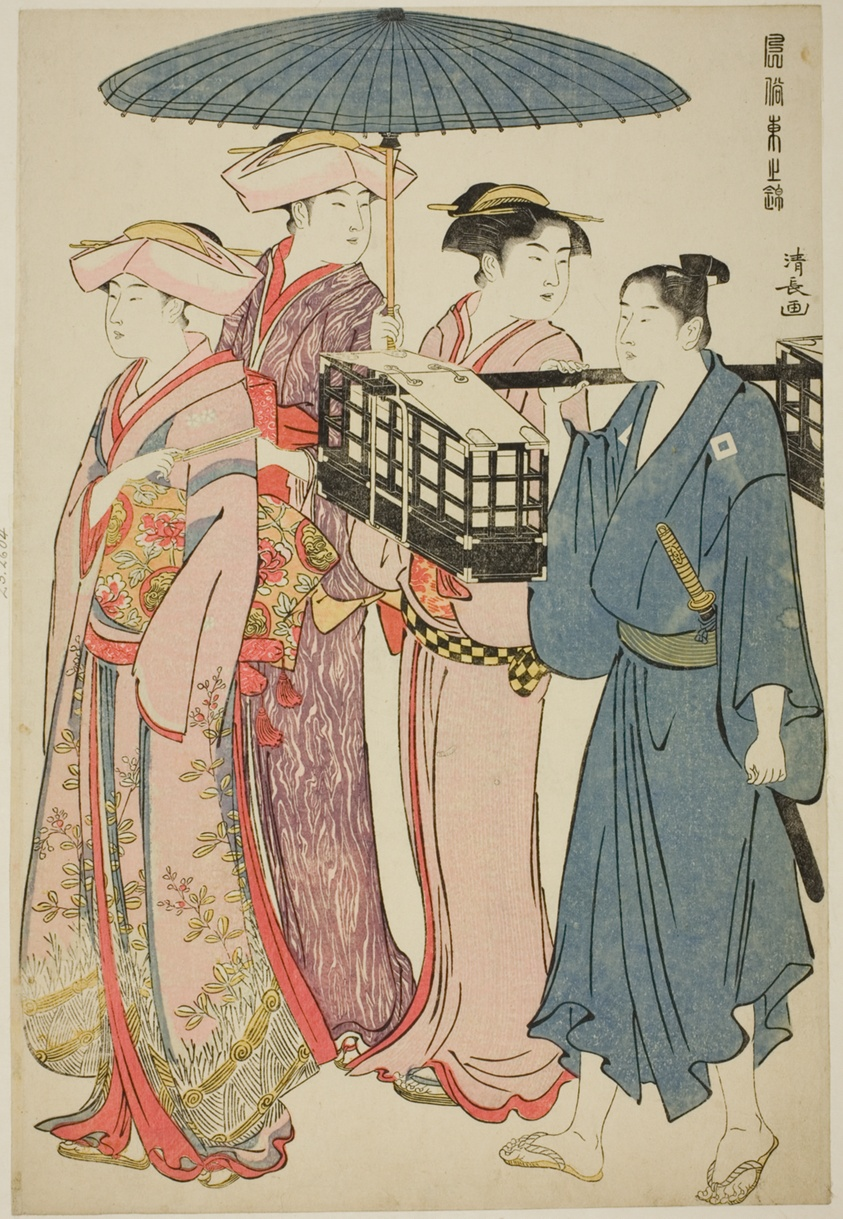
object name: Print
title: Going to a Picnic, from the series "A Brocade of Eastern Manners (Fuzoku Azuma no nishiki)"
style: Japanese (culture or style)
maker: Torii Kiyonaga (Japanese, 1752-1815)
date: c. 1783/84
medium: Color woodblock print; oban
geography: Japan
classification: woodblock print; print; asian art